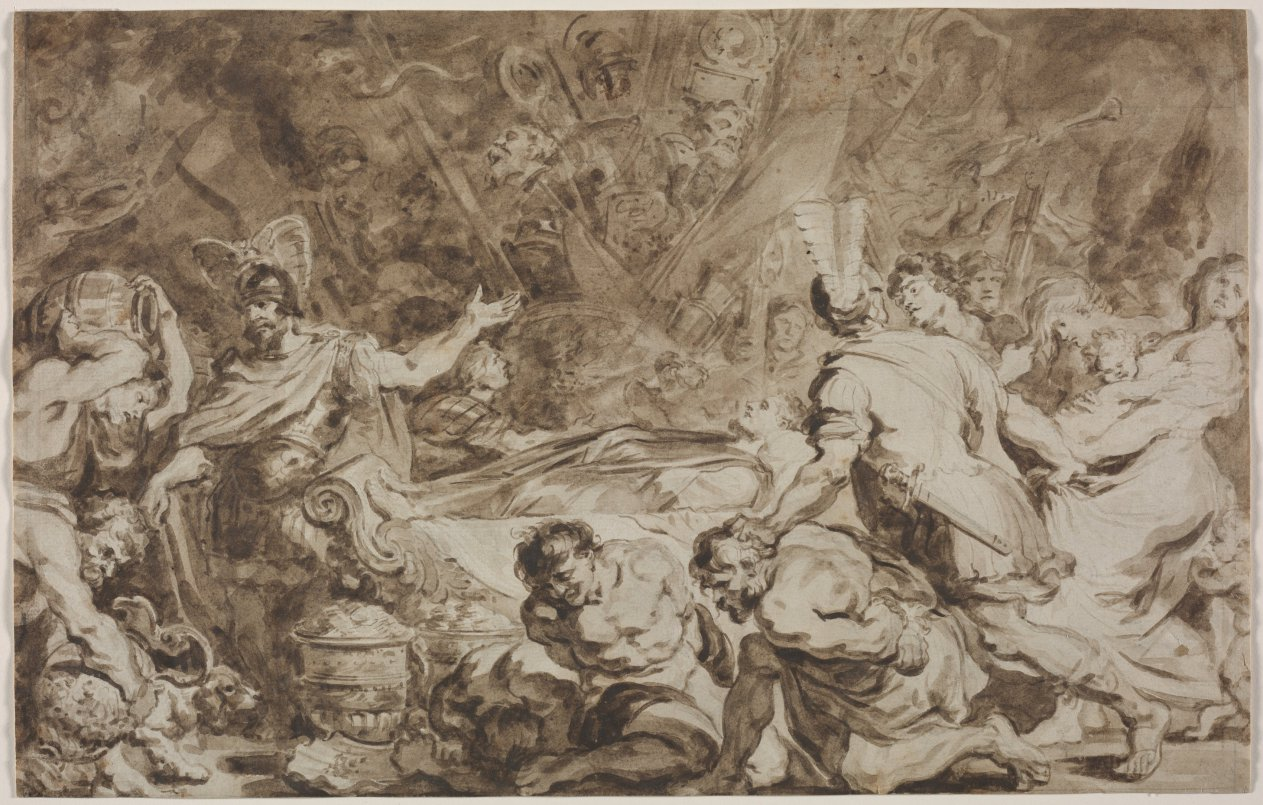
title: The Funeral of Decius Mus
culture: France, 18th century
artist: Jean-Honoré Fragonard (French, 1732–1806)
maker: after Peter Paul Rubens (Flemish, 1577–1640)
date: 1774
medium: brush and brown ink and wash over black chalk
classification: Drawing